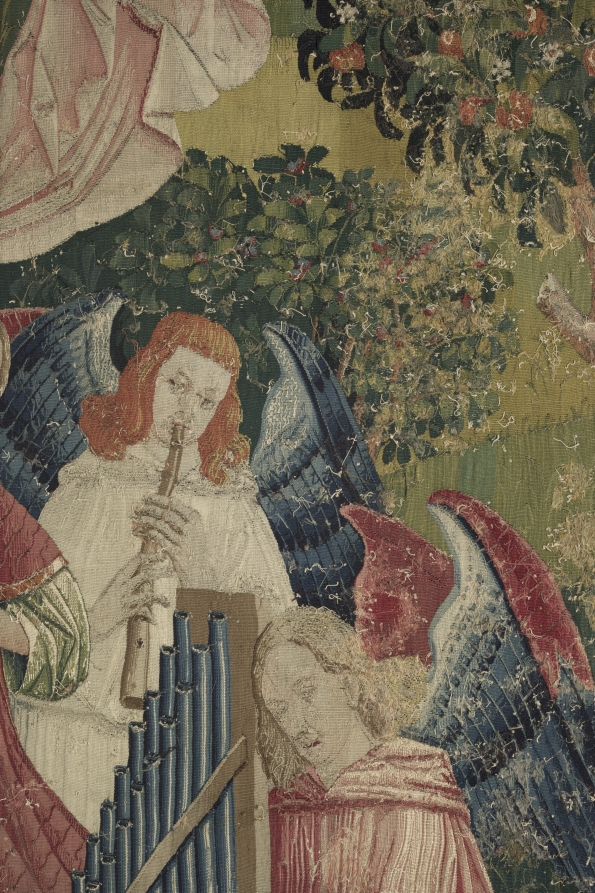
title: The Triumph of Eternity (from Chateau de Chaumont set)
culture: France, Lyon(?), early 16th century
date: 1512–15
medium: silk and wool; tapestry weave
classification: Tapestry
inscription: French verse in Gothic letters translates as follows: "Nothing triumphs by right authority, Unless it be conducted by Eternity. Nothing is permanent beneath the firmament, But above us triumphs Eternity."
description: The Triumph of Eternity is represented by the Coronation of the Virgin. Dressed in crimson velvet with an opulent brocaded velvet shawl, the Virgin is seated in the center as two angels hold a crown over her head. Five musical angels surround her playing an organ, recorder, straight cornetto, harp, and lute, while another sings from an open music book. The scenes in the set display a conservative style in which the figures are placed in shallow landscapes, thereby ignoring pictorial innovations for depicting space and mass. The verse in Old French at the top states: Nothing triumphing by due authority Remains permanent and durable. Nothing is permanent under the heavens, But above, eternity triumphs.